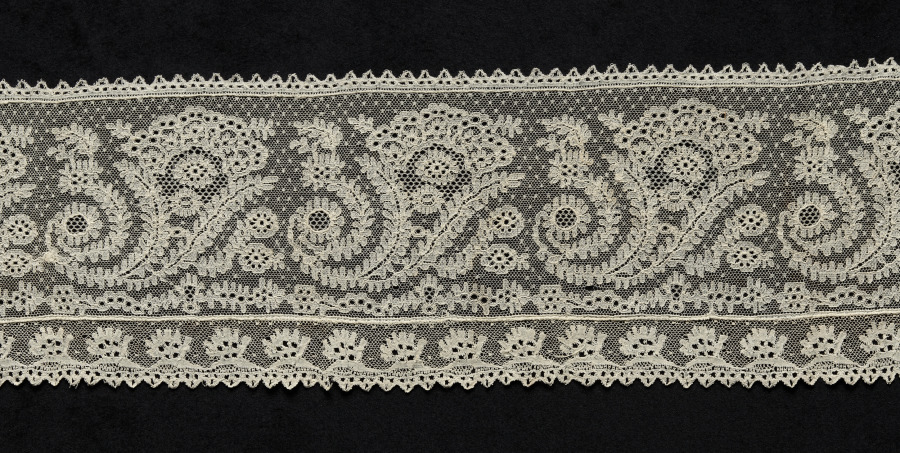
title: Lace Cap Piece(?)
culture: France, Lille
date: 1800s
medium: Bobbin lace (Lille lace)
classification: Lace